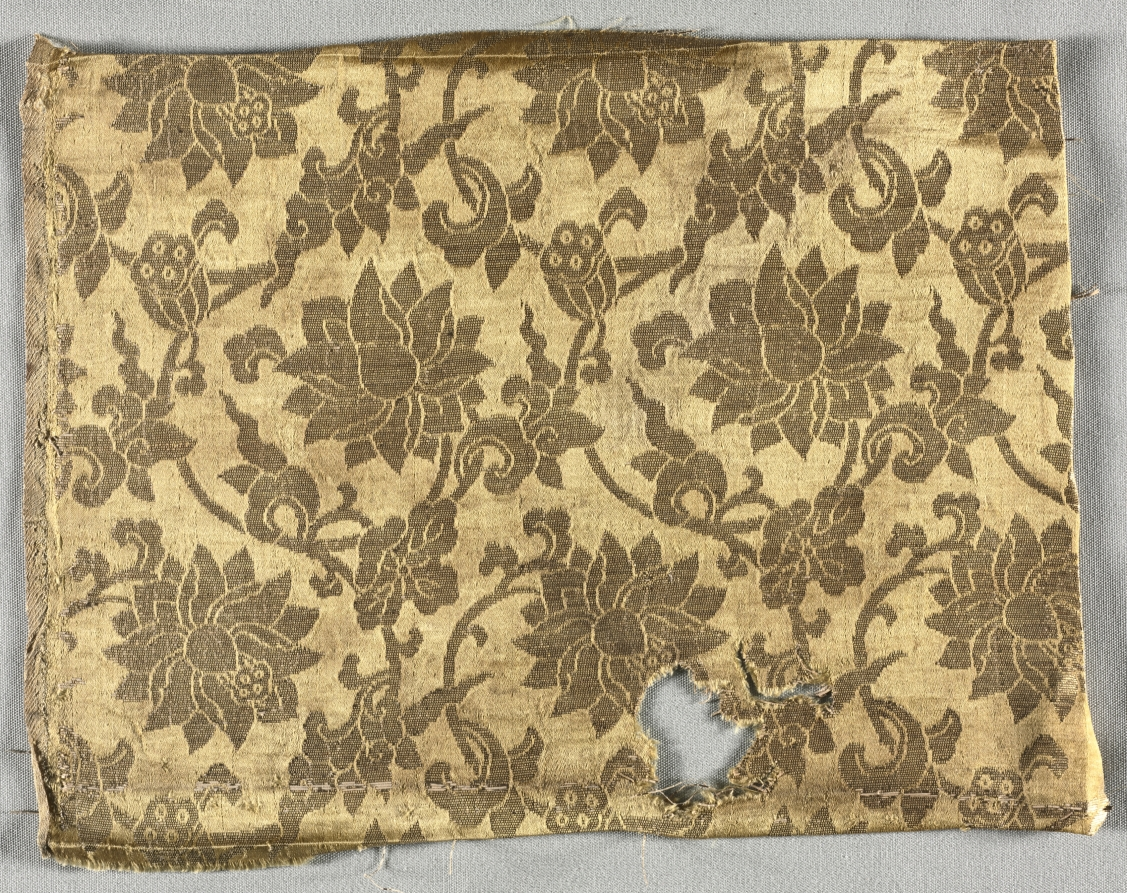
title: Textile Fragment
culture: Japan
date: 1800s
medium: Compound weave: silk and metal thread weft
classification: Textile